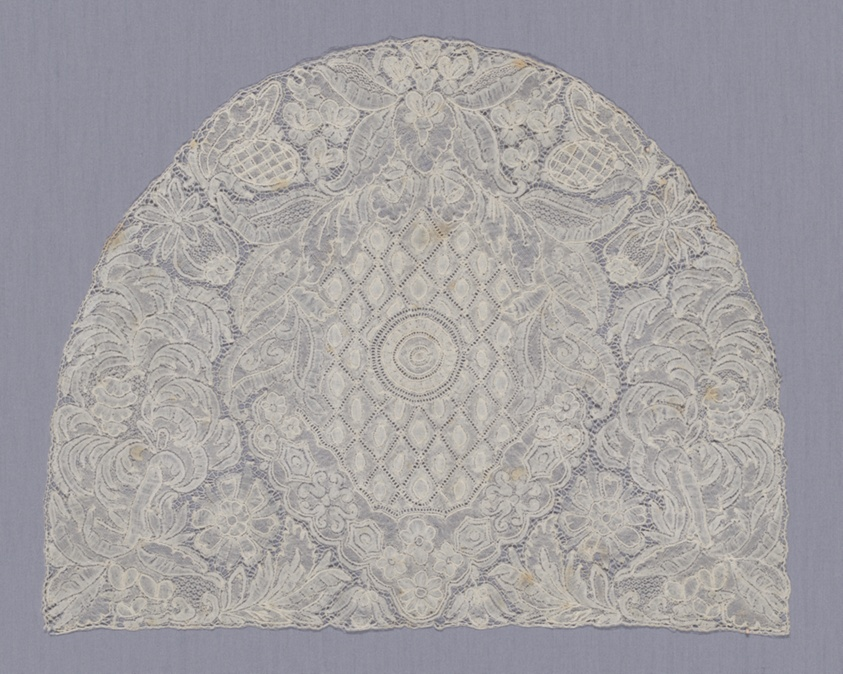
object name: Costume and Accessories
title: Cap Crown and a Pair of Lappets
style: 18th Century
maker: Flanders, Brussels (modern day Belgium)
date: 1720s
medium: Linen, bobbin part lace of a type known as "Brussels"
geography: Flanders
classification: costume accessory; lace - bobbin; lace; textile; costume - lace; costume accessory - headdress; costume accessory worn above the waist; headdress; costume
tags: floral motifs, diamond shapes, flowers, foliage